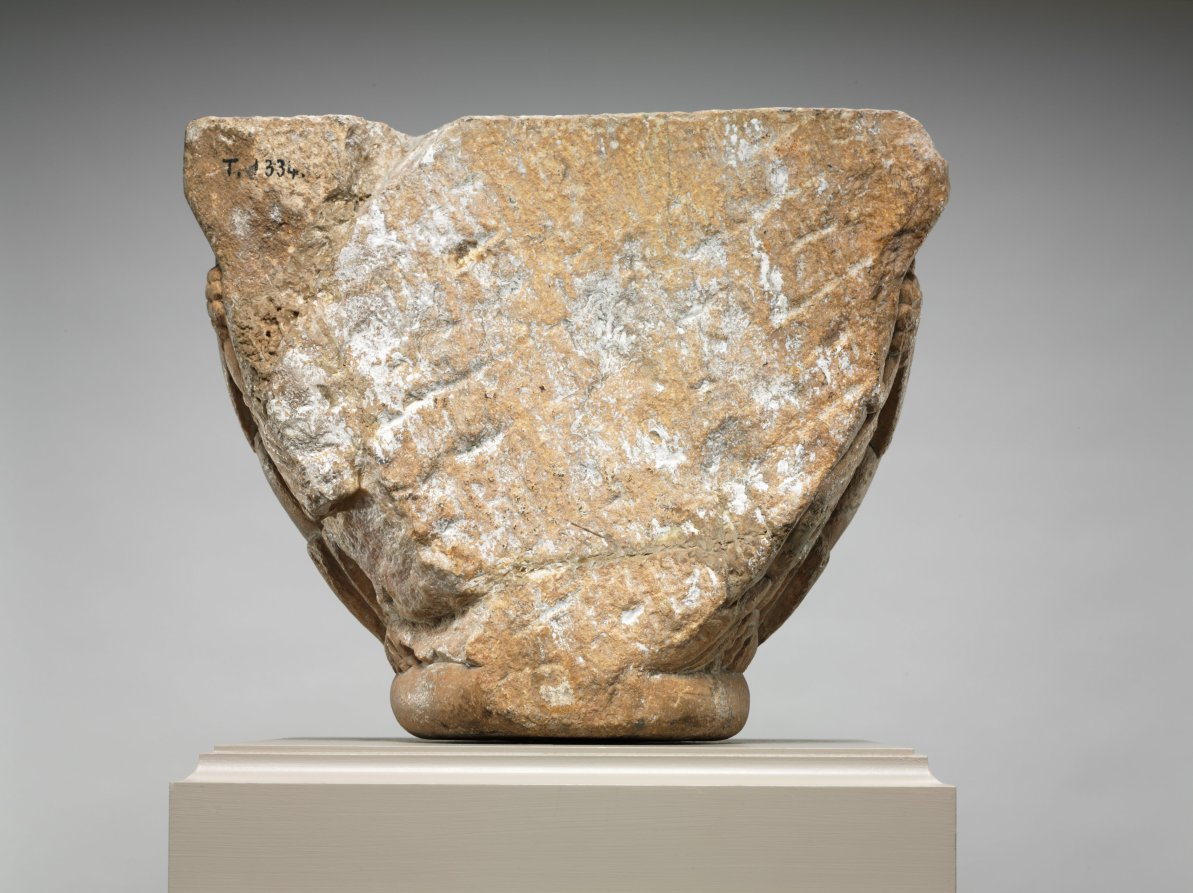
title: Engaged Capital with Lions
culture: Northern Spain (Navarre ?) or Southwest France (Pyrénées or Roussillon ?), mid-12th century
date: 1145–64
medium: marble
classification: Sculpture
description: The compositional motif of confronted and addorsed beasts illustrated on this capital was especially popular in churches along the pilgrimage roads.